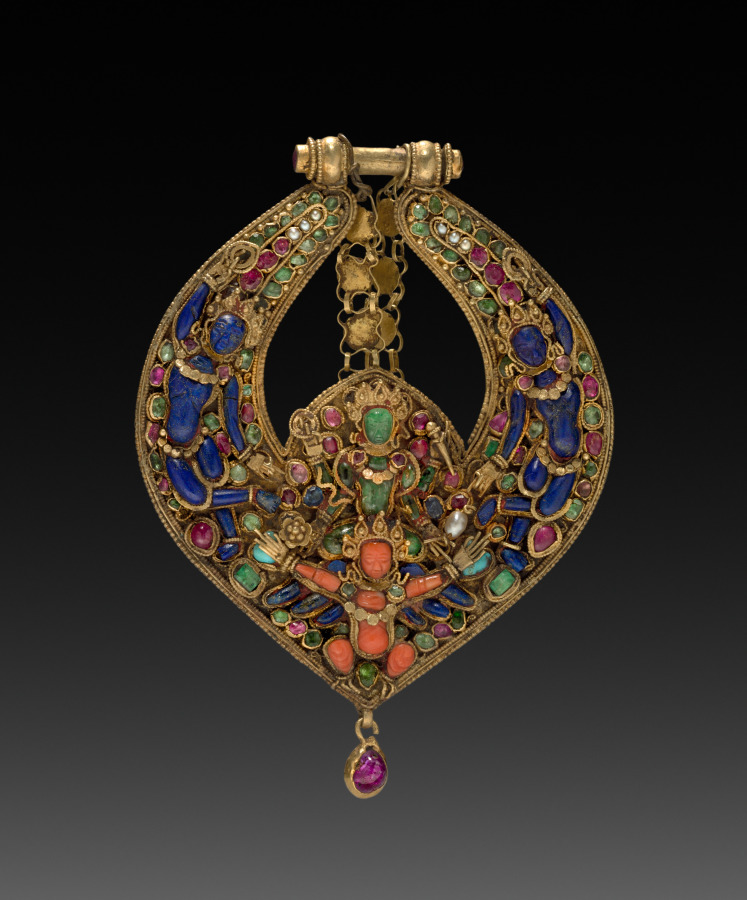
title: Deity Earring with Vishnu on Garuda (front) and chepu (monster mask) (back)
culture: Nepal, Kathmandu Valley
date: 1600s or 1700s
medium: Gold set with precious and semi-precious stones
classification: Jewelry